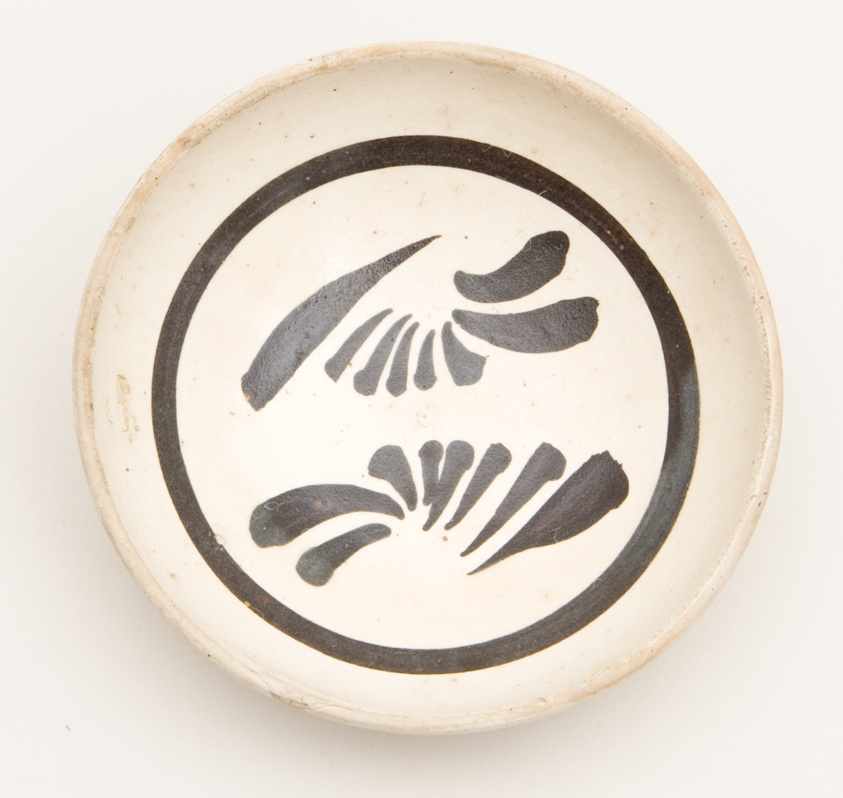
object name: Vessel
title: Bowl with Stylized Leaf-strokes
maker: China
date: Song/Jin dynasty, c. 12th/13th century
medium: Cizhou ware, glazed stoneware painted in iron-brown slip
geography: China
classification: vessel